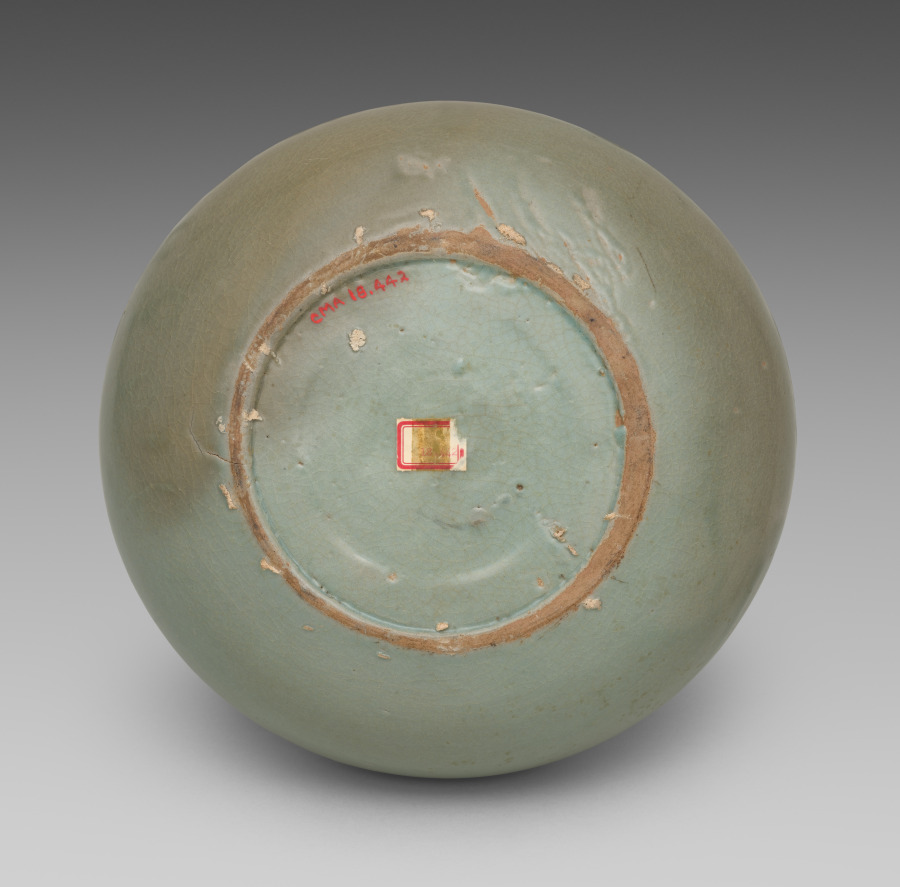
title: Bowl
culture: Korea, Goryeo dynasty (918–1392)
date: 1100s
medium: celadon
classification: Ceramic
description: As early as the seventh century, the practice of drinking tea became an important part of elite culture in Korea. In enjoying teas, elites commissioned a variety of types of utensils and vessels including this large bowl, not only to make their tea-drinking experience more exciting, but also to show their refined taste.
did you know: The distinctive bluish and greenish glaze of Goryeo celadons, shown in this bowl, is the result of distinctive small and long Korean kilns, which maintained a low oxygen saturation with a high level of carbon dioxide.